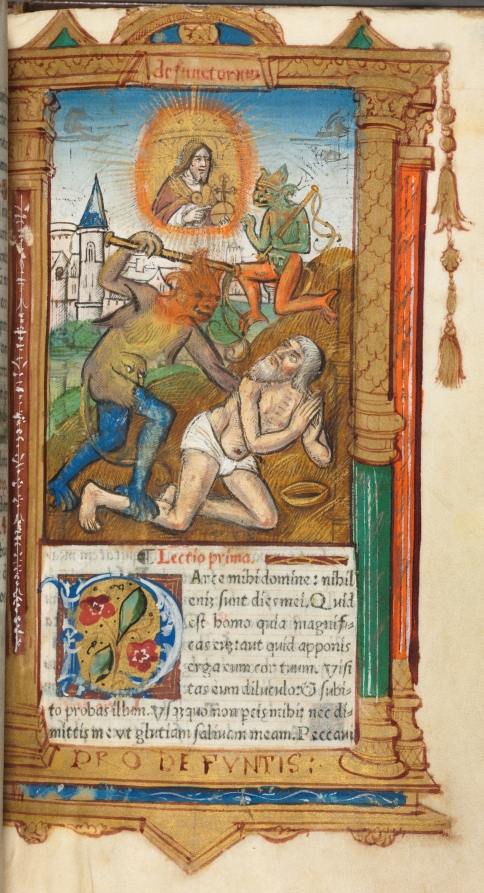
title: Printed Book of Hours (Use of Rome): fol, 78r, Job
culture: France, Paris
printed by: Guillaume Le Rouge (French, Paris, active 1493–1517)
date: 1510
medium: 112 Printed folios on parchment, bound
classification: Bound Volume